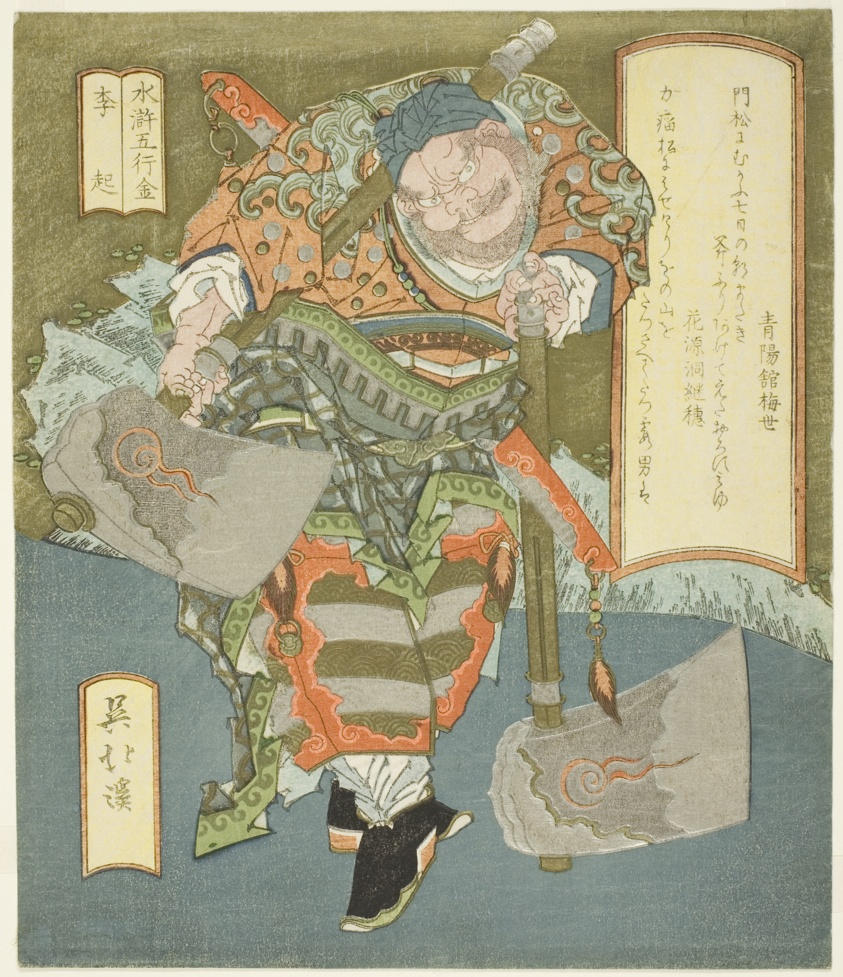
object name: Print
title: Metal: Li Kui (Kin, Riki), from the series "The Five Elements of The Water Margin (Suiko gogyo)"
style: Japanese (culture or style)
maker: Totoya Hokkei (Japanese, 1780-1850)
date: early 1830s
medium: Color woodblock print; shikishiban, surimono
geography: Japan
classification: woodblock print; print; asian art